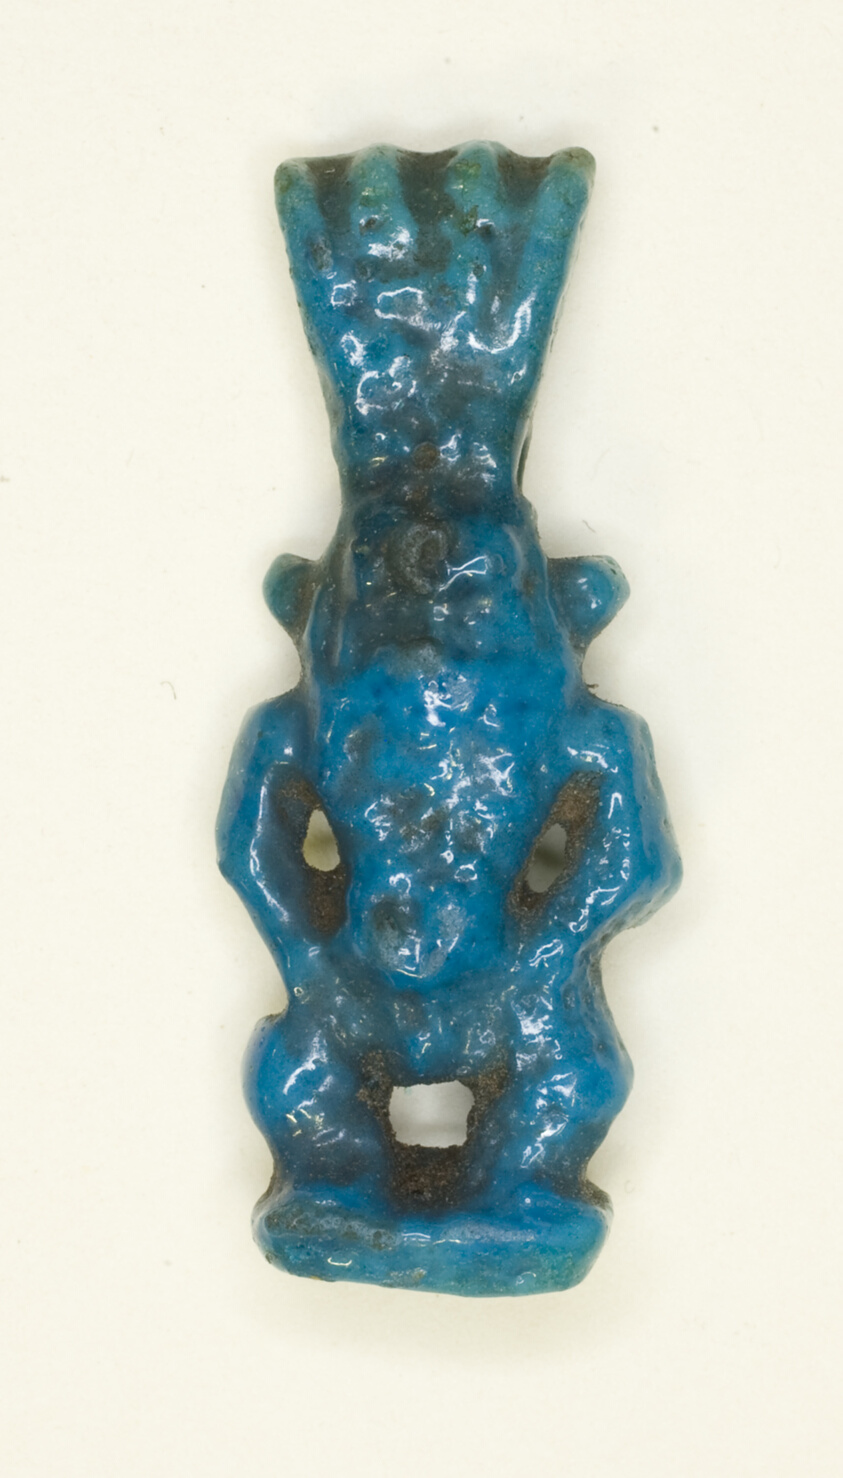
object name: Costume and Accessories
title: Amulet of the God Bes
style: third intermediate period, egyptian, ancient, twenty-fifth dynasty, twenty-first dynasty, twenty-fourth dynasty, twenty-second dynasty, twenty-third dynasty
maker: Egyptian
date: Third Intermediate Period, Dynasties 21–25 (about 1069–664 BCE)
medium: Faience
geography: Egypt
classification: amulet; jewelry; ceramics; ancient art; costume; faïence (composite material)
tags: gods (deities)